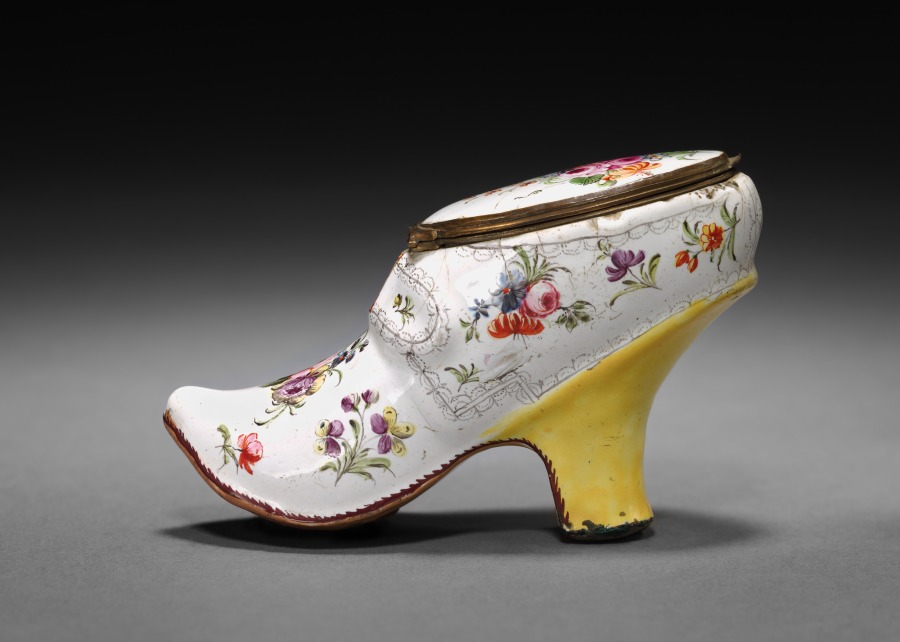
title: Box in Form of Shoe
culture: England or France, mid-18th Century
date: mid-18th century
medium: enamel on copper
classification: Enamel